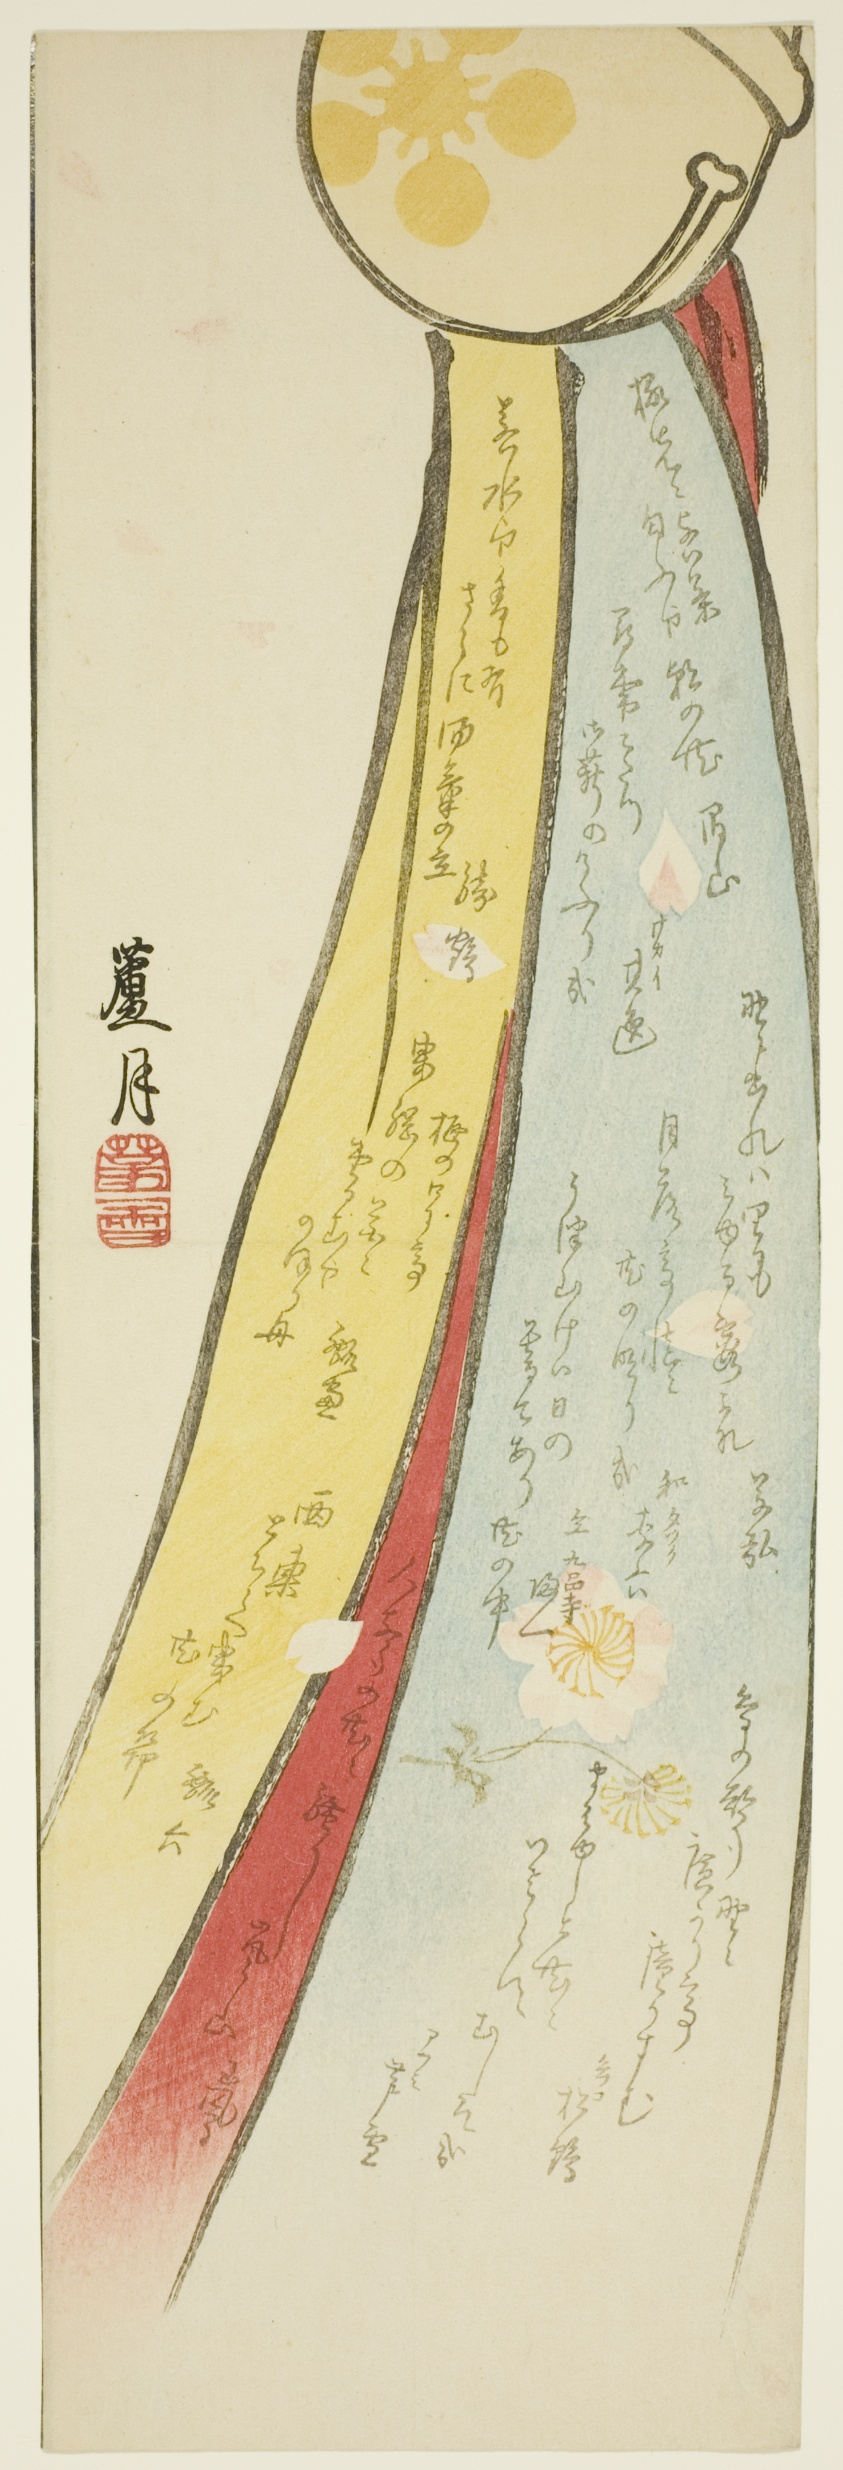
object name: Print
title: Tenman Shrine Bell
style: Japanese (culture or style)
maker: Nakagawa Rogetsu (Japanese, active 19th century)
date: 1860s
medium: Color woodblock print; surimono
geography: Japan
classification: woodblock print; print; asian art